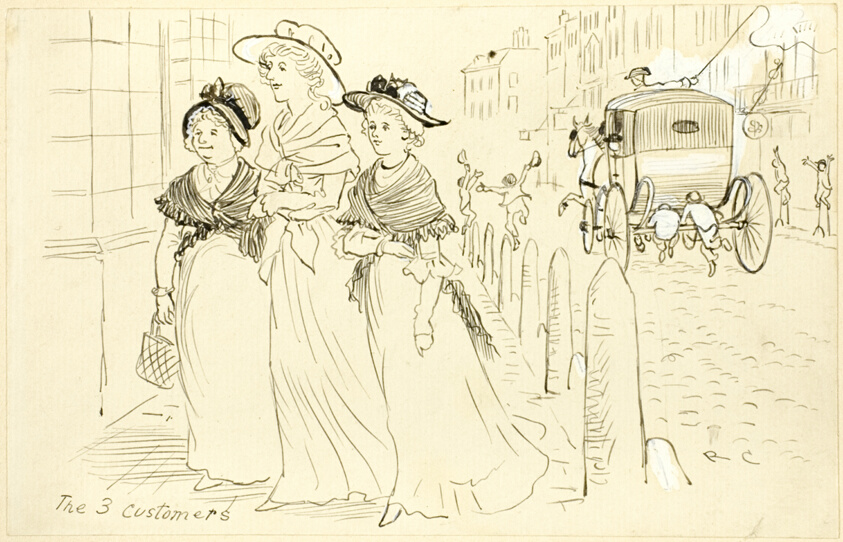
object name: Drawing and Watercolor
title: The Three Customers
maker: Randolph Caldecott (English, 1846-1886)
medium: Pen and black ink corrected with white gouache, over traces of graphite, on ivory laid paper, laid down on buff wove card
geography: England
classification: pen and ink drawings; drawings (visual works); prints and drawing